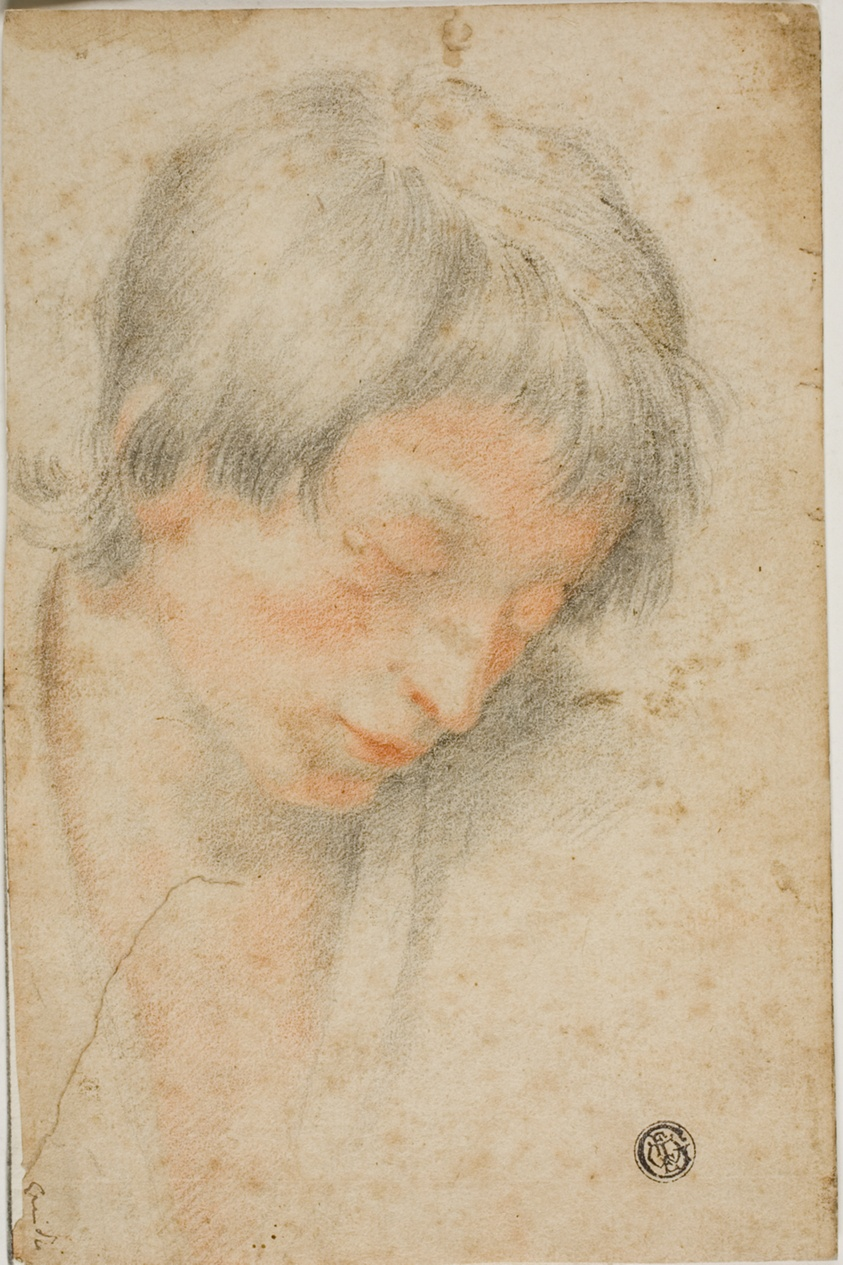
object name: Drawing and Watercolor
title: Head of Youth Looking Down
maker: Attributed to Matteo Rosselli (Italian, 1578-1650); or Giovanni Battista Vanni (Italian, 1599-1660); or Guido Reni (Italian, 1575-1642); or the circle of Carlo Dolci (Italian, 1616-1686); or the style of Matteo Rosselli (Italian, 1578-1650)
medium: Red and black chalk, on tan laid paper, laid down on ivory laid paper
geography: Italy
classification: chalk; drawings (visual works); prints and drawing